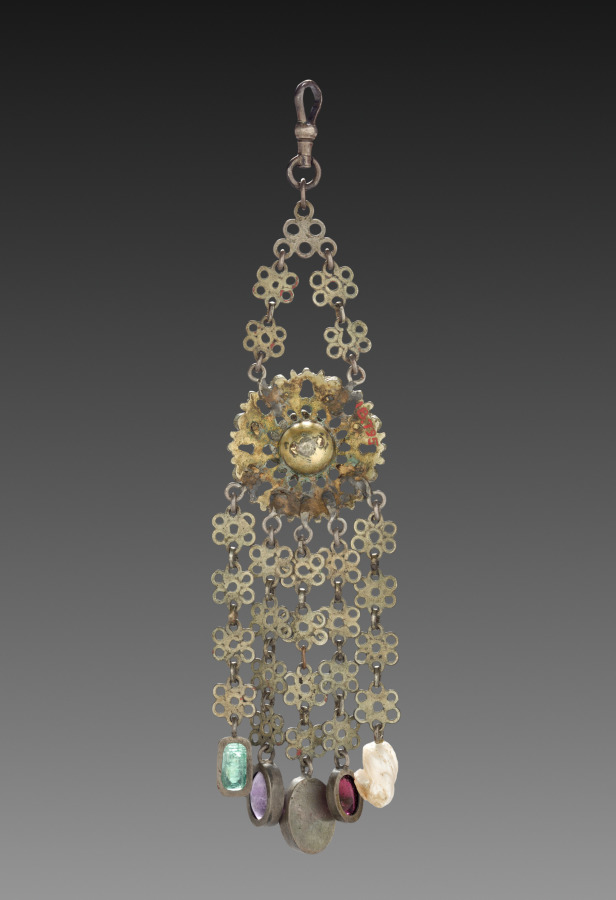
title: Watch Fob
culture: Russia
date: 1700s–1800s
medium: brass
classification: Jewelry